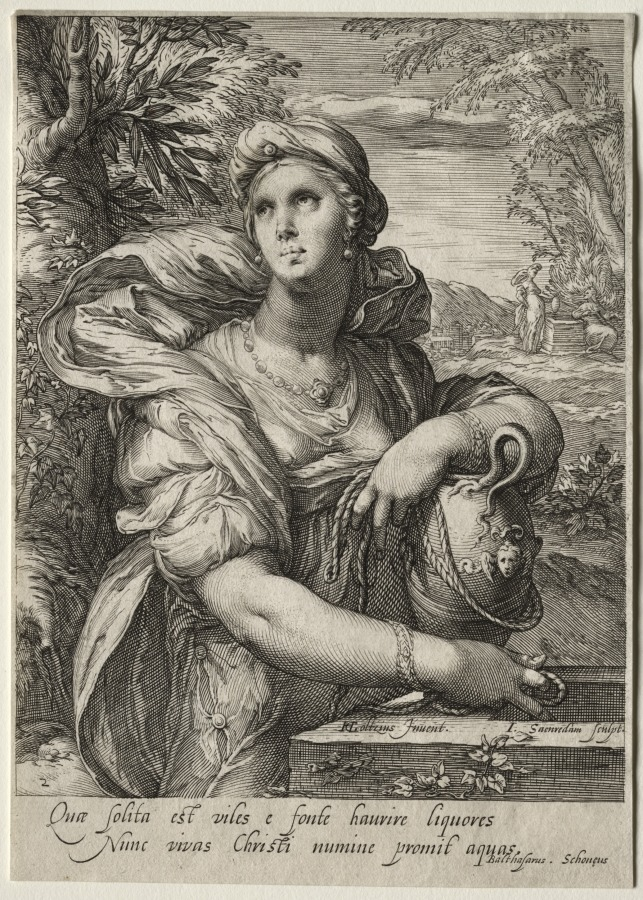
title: Heroines of the New Testament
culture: Netherlands, 16th century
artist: Jan Saenredam (Dutch, 1565–1607)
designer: after Hendrick Goltzius (Dutch, 1558–1617)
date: c. 1595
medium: engraving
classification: Print